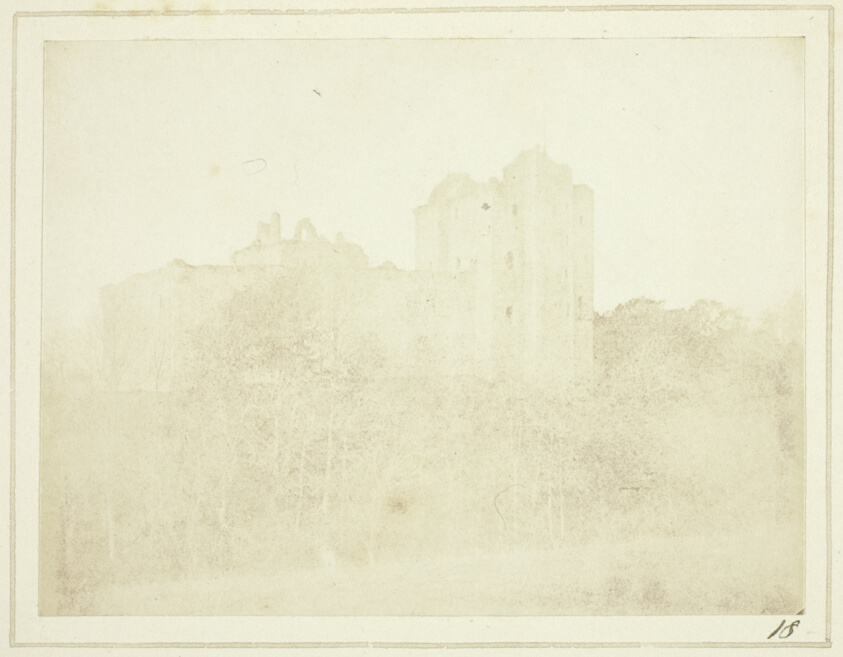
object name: Photograph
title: The Castle of Doune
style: 19th century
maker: William Henry Fox Talbot (English, 1800–1877)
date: 1844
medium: Salted paper print, plate XVIII from the album "Sun Pictures in Scotland" (1845)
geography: England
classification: salted paper print; photographic process; photography; photograph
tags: Collected by Hugh Edwards